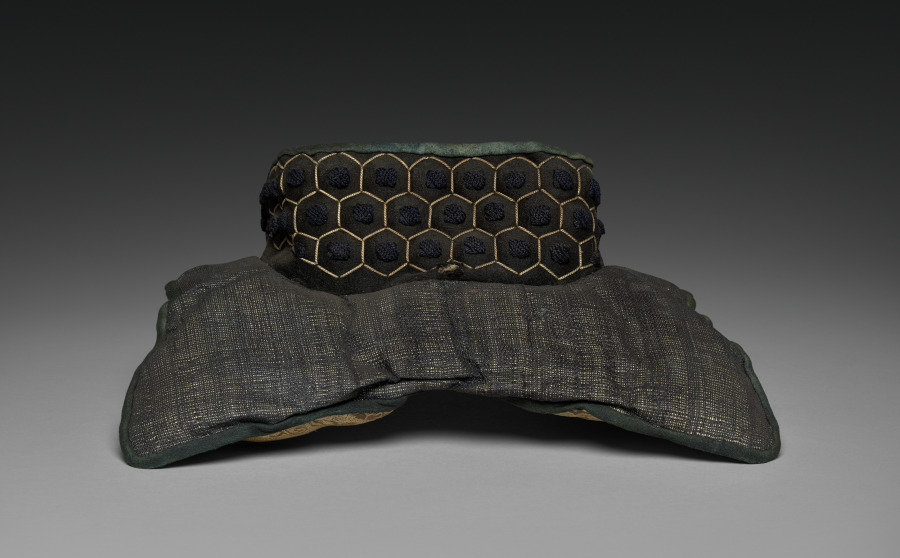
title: Collar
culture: Japan, Edo period (1615–1868)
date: 1600s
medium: Iron, lacquer, textile (silk)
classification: Arms and Armor